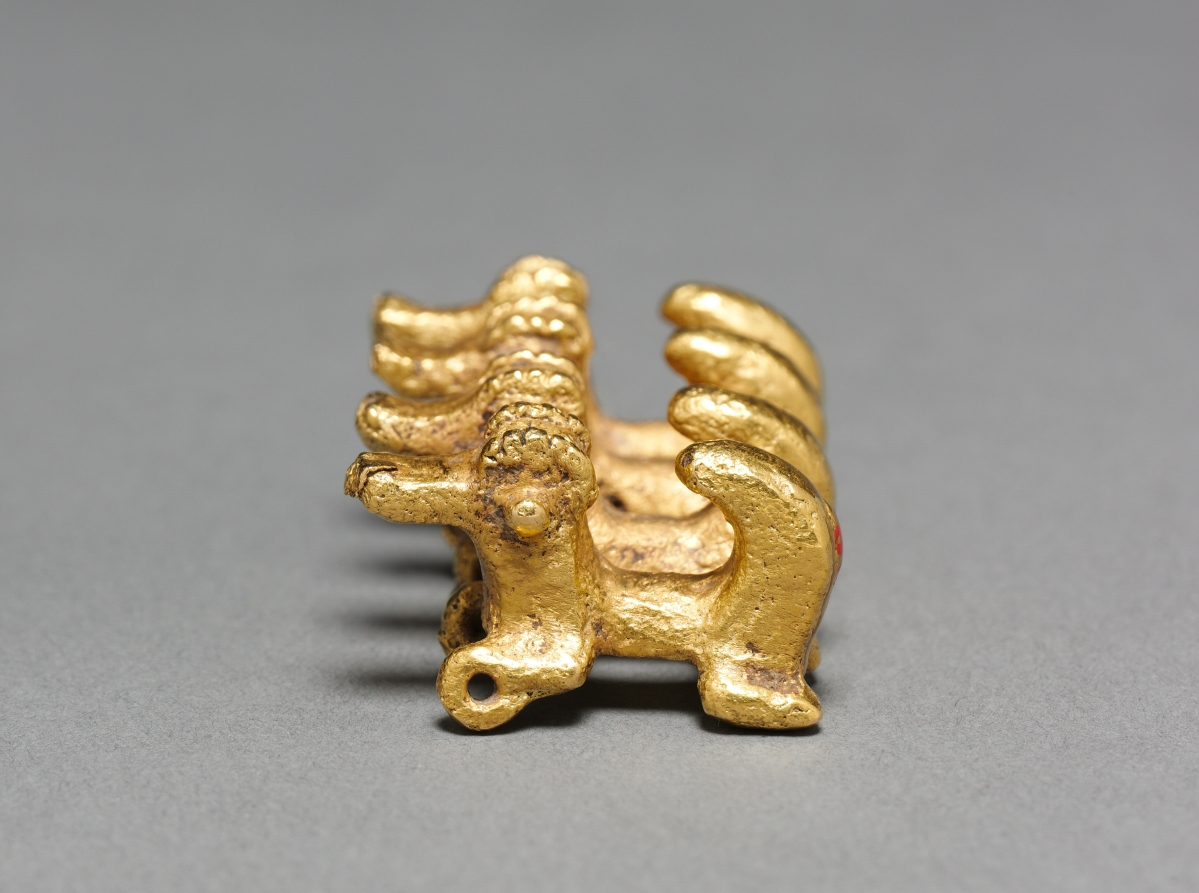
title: Curly-Tailed Animal Pendant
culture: Panama, Initial style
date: 100–800 CE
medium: gold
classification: Metalwork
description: A favored Initial-style subject is a charming animal whose curly tail -- its most impressive feature -- may derive from a monkey’s. Its other traits vary considerably, causing it to be identified as everything from a dog to a duck. Initial-style gold ornaments represent Panama’s oldest metalwork. Since metal technologies appeared suddenly and fully developed in Panama, it is likely that they were introduced from the outside, probably from Colombia to the south.